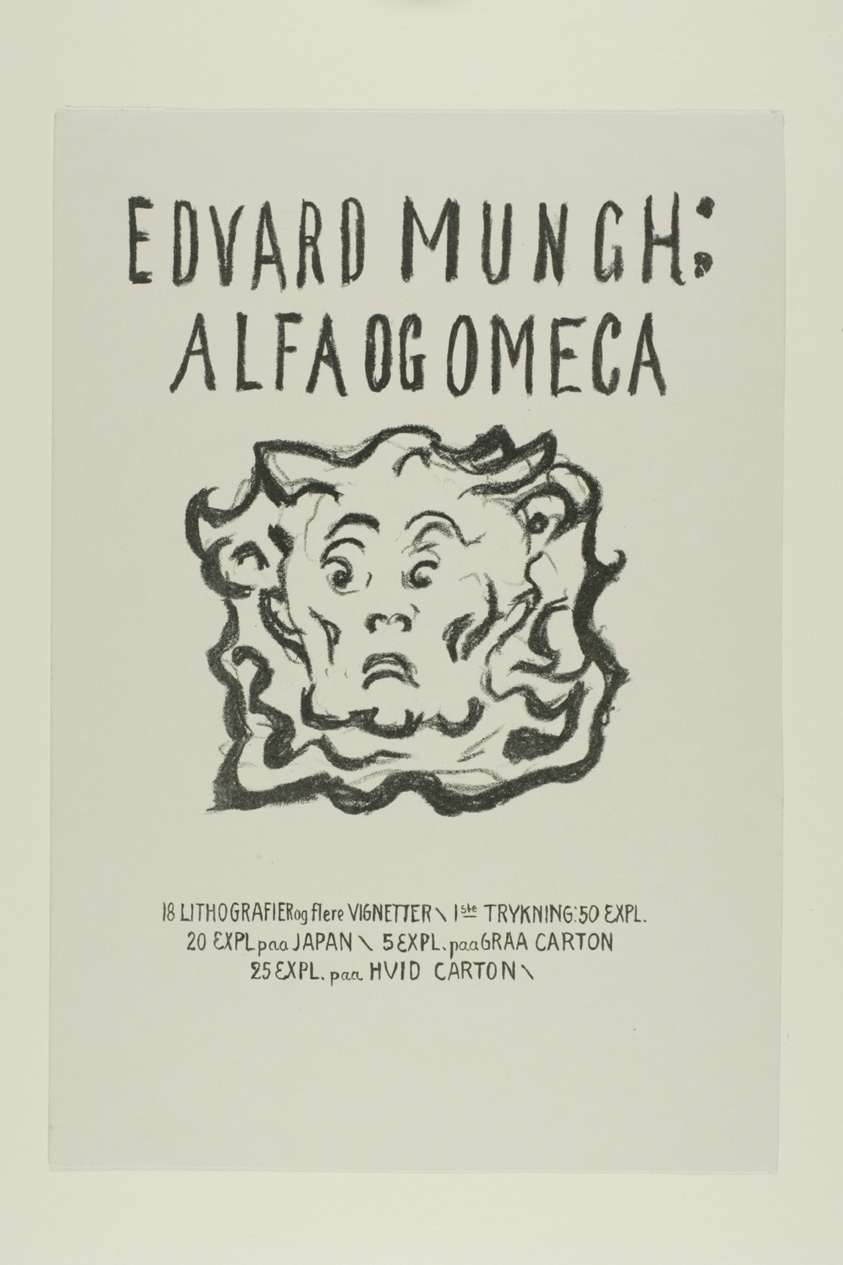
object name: Print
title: Alpha and Omega:Title Page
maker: Edvard Munch (Norwegian, 1863-1944)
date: 1908/09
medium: Lithograph on paper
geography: Norway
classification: lithograph; print; prints and drawing